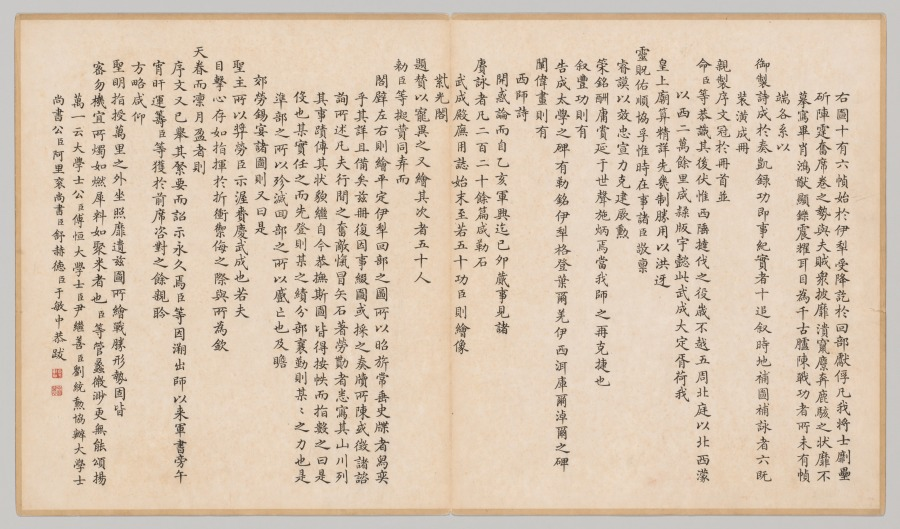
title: Battle Scenes of the Quelling of Rebellions in the Western Regions, with Imperial Poems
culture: China, Qing dynasty (1644–1911), Qianlong reign (1736–95)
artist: Giuseppe Castiglione (Italian, 1688–1766)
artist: Jean Damascene Sallusti (Italian, d. 1781)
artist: Jean Denis Attiret (French, 1702–1768)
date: c. 1765–74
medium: Etchings, mounted in album form, 16 leaves plus two additional leaves of inscriptions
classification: Print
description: This set of etchings was commissioned by Emperor Qianlong to record in pictorial terms the courage of his generals and soldiers in quelling the rebellions in the Western Regions. Qianlong added his own poem to each of the etchings, indicating his appreciation and pride in this demonstration of military might. "Western Regions" refers to the present-day Xingjiang province, often described in Western writing as "Central Asia."